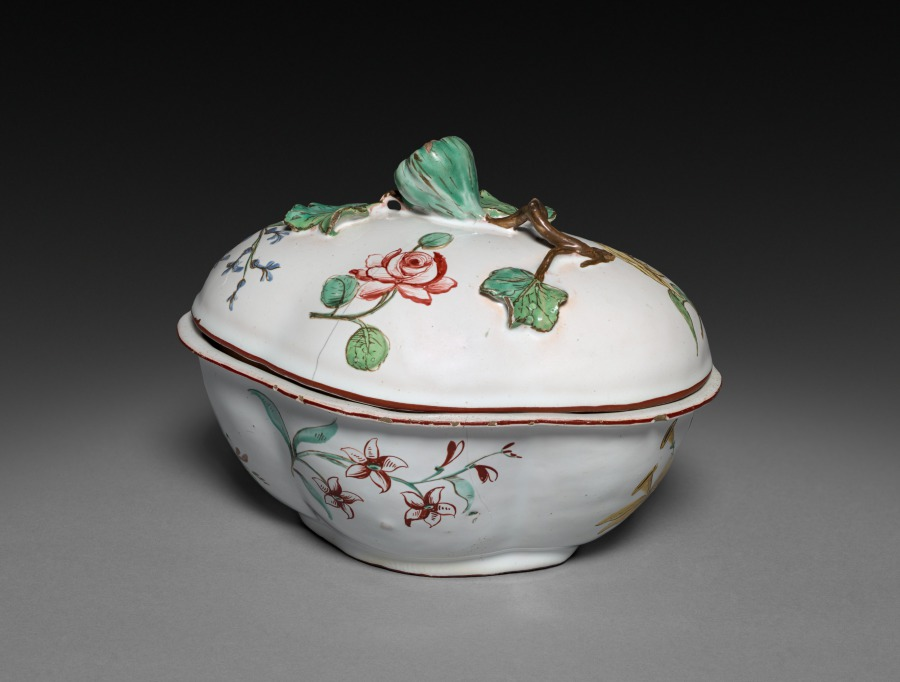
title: Sugar Basin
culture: France, 18th century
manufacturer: Sceaux Factory (French, active 1748–66)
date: c. 1750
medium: faience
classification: Ceramic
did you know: In medieval Italian churches, painted altarpieces served as a focal point for worshippers during the rituals of faith. The figures of Jesus, Mary, and eight saints are framed by a golden background that would have glistened in the flickering candlelight of the church.